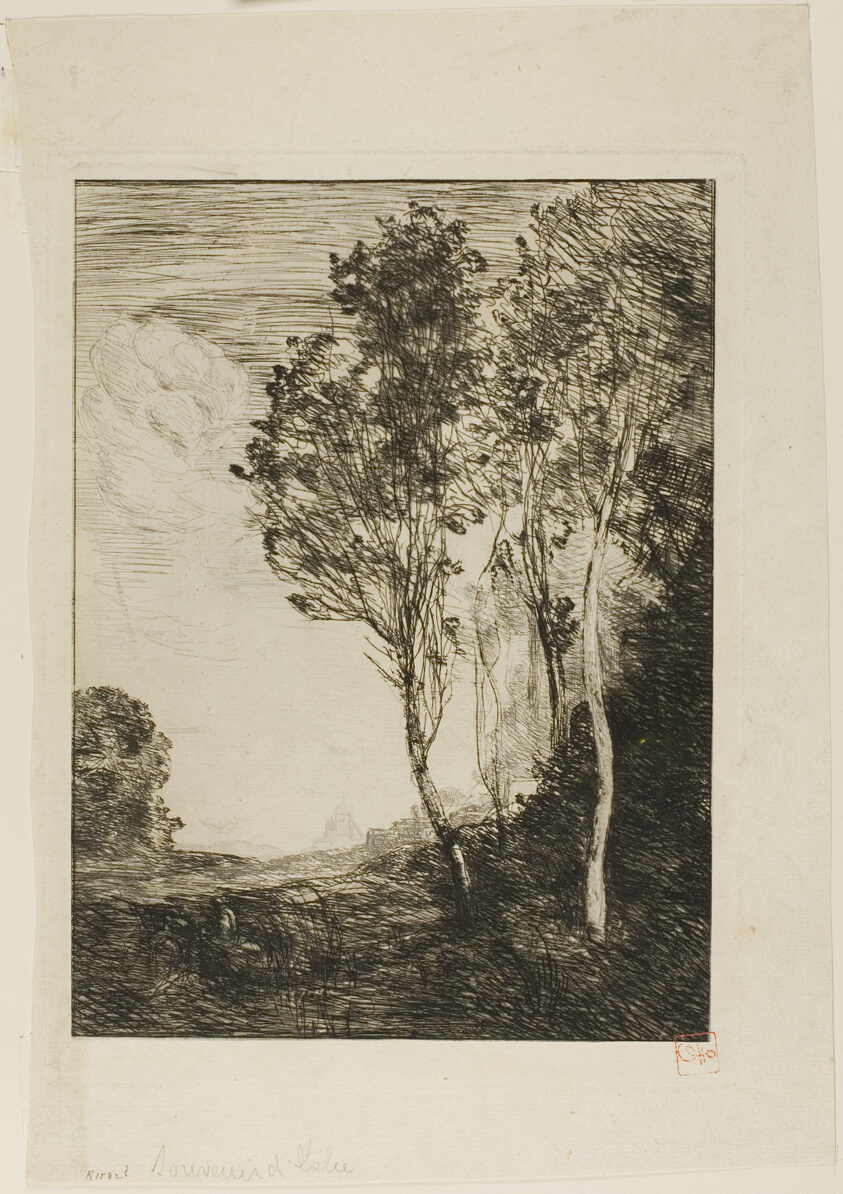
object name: Print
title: Souvenir of Italy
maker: Jean-Baptiste-Camille Corot; French, 1796-1875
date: 1866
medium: Etching on paper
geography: France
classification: etching; print; prints and drawing